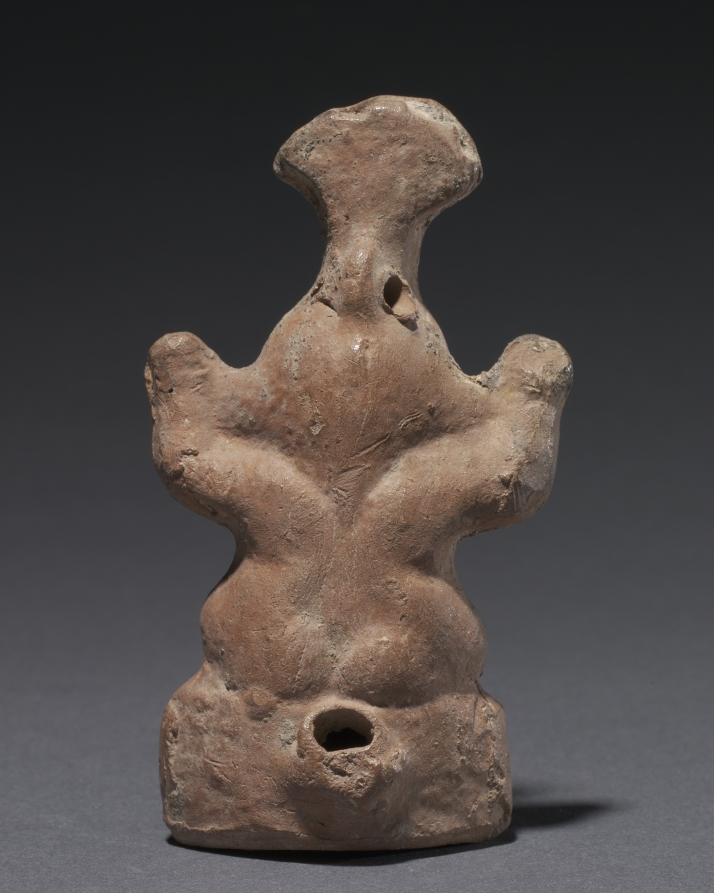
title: Bes Lamp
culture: Egypt, Greco-Roman period (332 BCE–395 CE)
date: 100 BCE–100 CE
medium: Nile silt clay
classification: Vessels